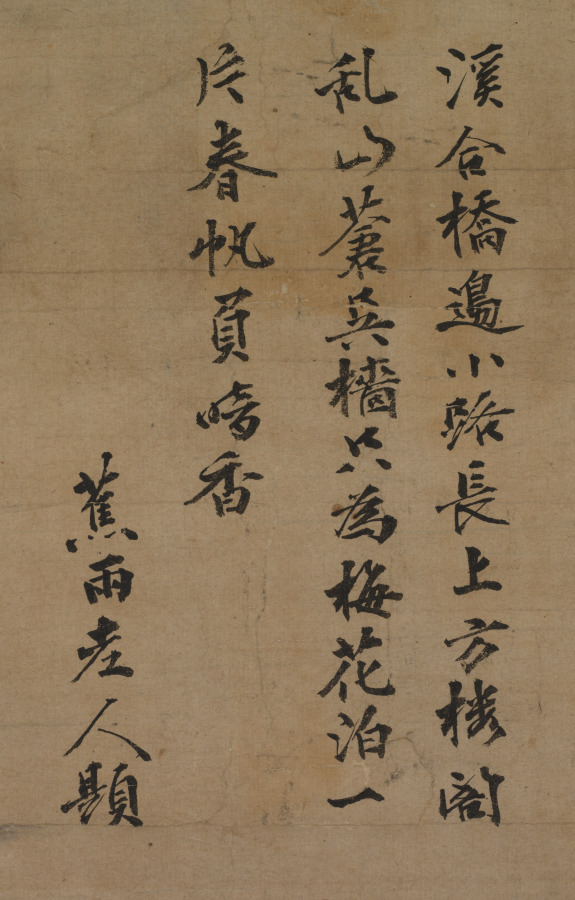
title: Landscape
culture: Japan, Muromachi period (1392–1573)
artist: attributed to Kenkō Shōkei (Japanese, active 1478–1506)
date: late 1400s–early 1500s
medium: hanging scroll, ink and light color on paper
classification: Painting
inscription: inscription above signed Shō'u Kojin; calligraphy by the Shokōji priest Tōgan Zuisen 桃源瑞仙 (1430–89)